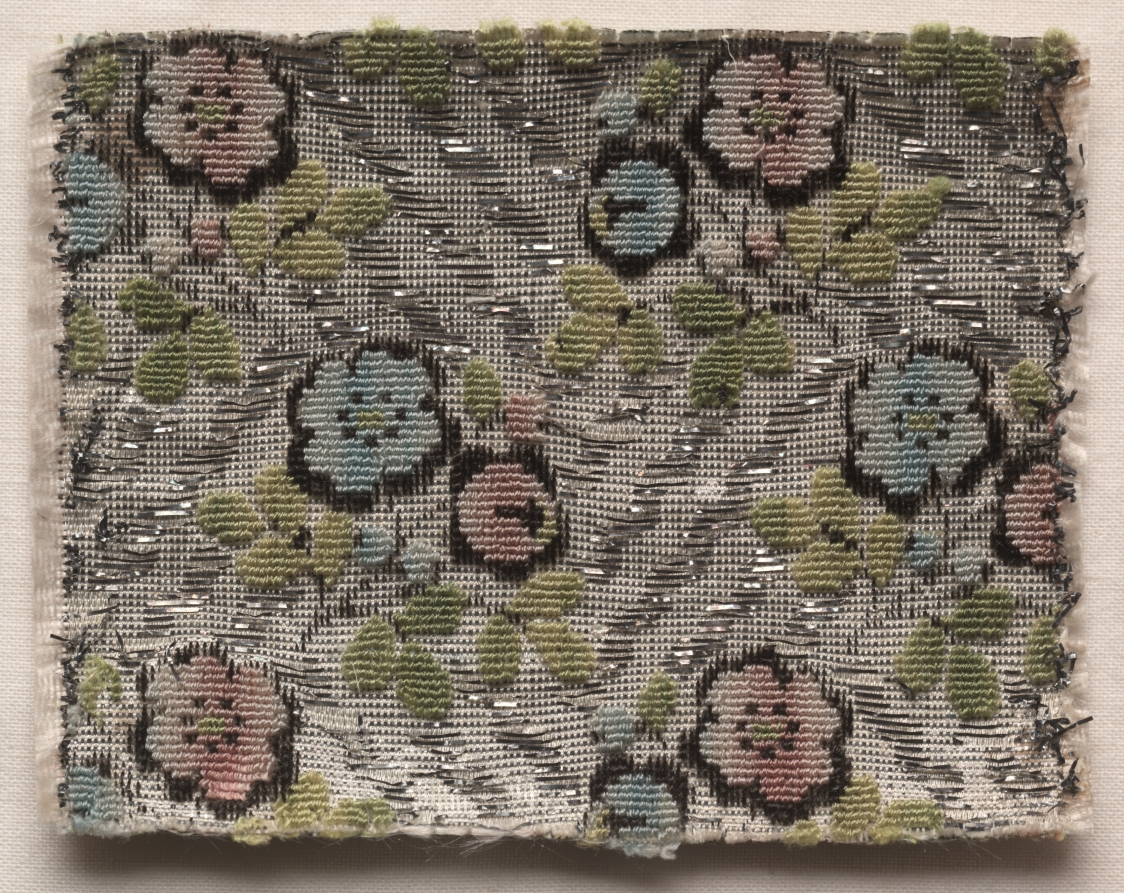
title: Textile Fragment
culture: France, late 18th century, Period of Louis XVI (1774-1793)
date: 1774–1793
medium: velvet (cut, uncut, supplementary weft); silk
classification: Velvet